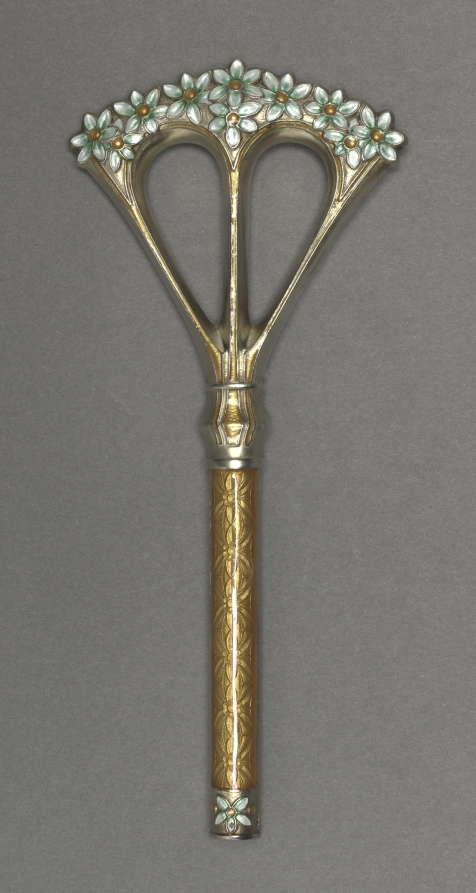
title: Parasol Handle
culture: Norway, Oslo, early 20th Century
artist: firm of Jacob Tostrup (Norwegian, 1806–1890)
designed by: possibly by Torolf Prytz (Norwegian)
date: c. 1900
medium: silver and enamel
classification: Enamel